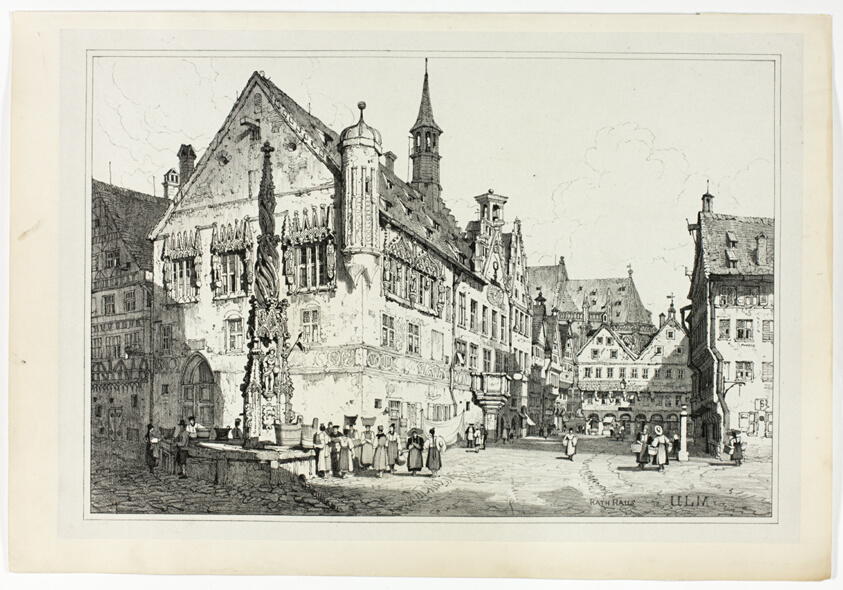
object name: Print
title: Rath Haus, Ulm, from Facsimiles of Sketches made in Flanders and Germany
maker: Samuel Prout (English, 1783-1852); printed by Charles Joseph Hullmandel (English, 1789-1850)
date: 1833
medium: Lithograph in black on grayish-ivory chine, laid down on ivory wove paper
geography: England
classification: lithograph; print; prints and drawing